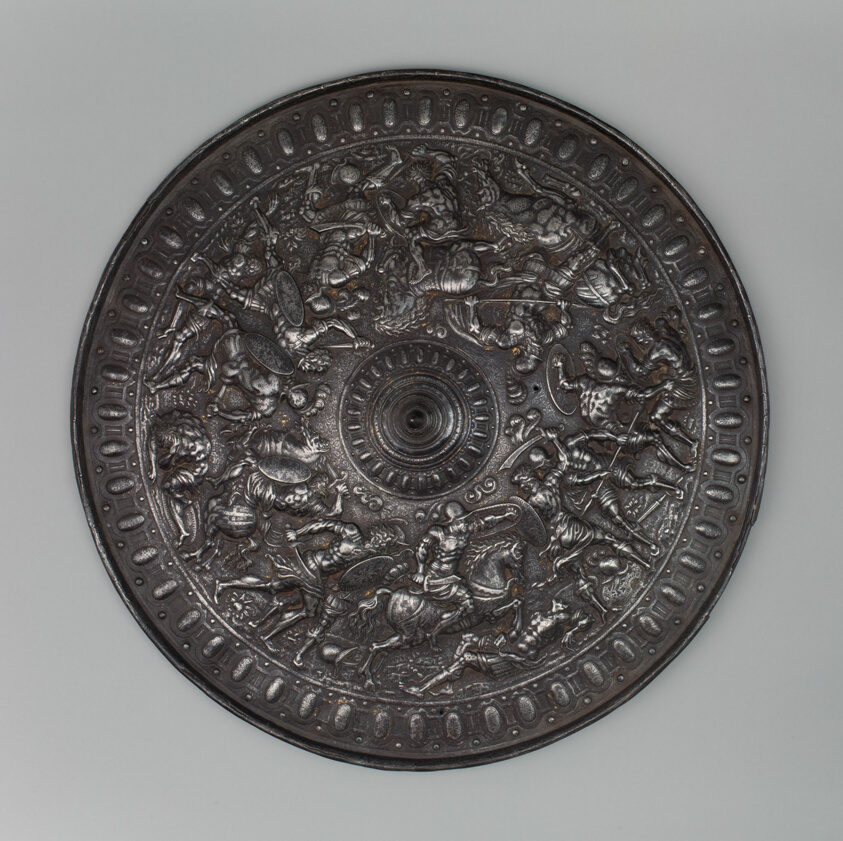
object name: Armor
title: Parade Shield of Henry II, King of France (reigned 1547-1559), copy of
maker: Simoni of Geneva; Switzerland, Geneva, active c. 1910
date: 1909 (copy of c. 1555 style)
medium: Iron, traces of gilding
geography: Geneva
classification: shield; armor; arms and armor